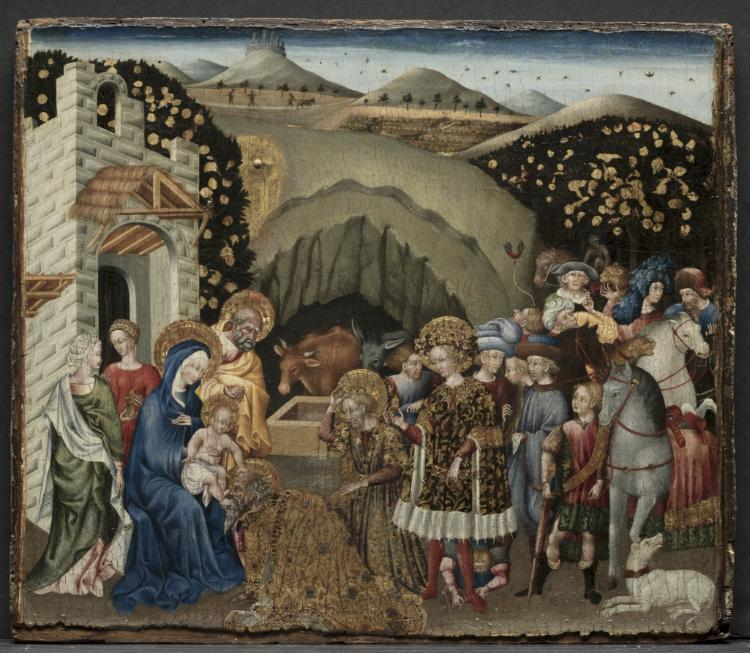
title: The Adoration of the Magi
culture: Italy, Siena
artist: Giovanni di Paolo (Italian, c. 1403–1482)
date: 1440–45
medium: tempera and gold on wood panel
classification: Painting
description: According to the Gospel of Matthew, three Magi, guided by a star, found the newborn Christ and laid gifts before him. Artists throughout the 15th century elaborated considerably upon this biblical account, devoting particular attention to the Magi’s entourage, which gave them an opportunity to depict the splendor of contemporary aristocratic life. Here, the Magi solemnly honor the divine child in the Virgin’s arms, while their bustling retinue of courtiers and animals provides an exuberant visual diversion. Di Paolo was one of the leading painters in 15th-century Siena, noted both for his manuscript illuminations and painted panels supplied to the city’s churches.